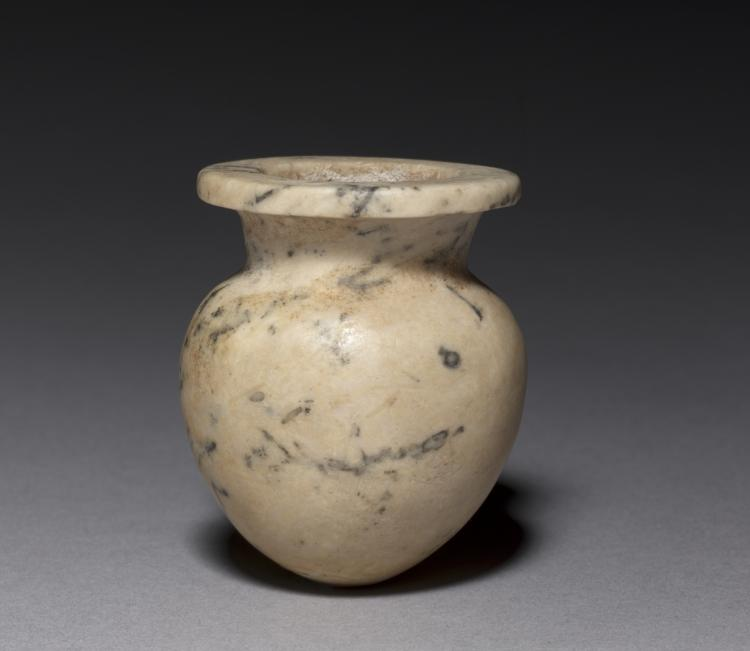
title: Collared Jar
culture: Egypt, Old Kingdom (2647–2124 BCE)–First Intermediate period (2123–2040 BCE), Dynasties 5–11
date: 2454–1980 BCE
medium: limestone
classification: Vessels